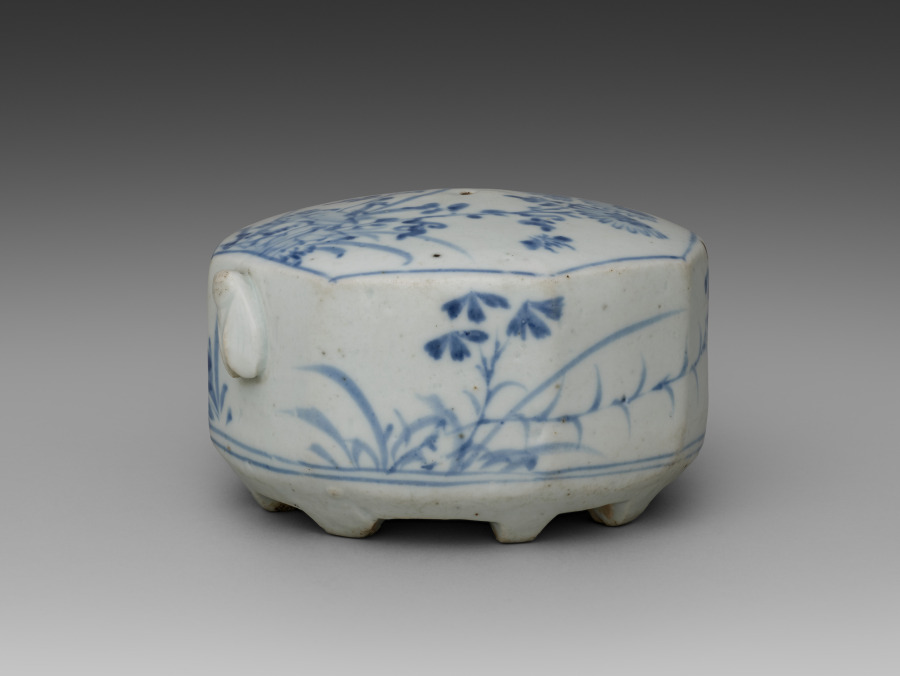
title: Octagonal Water Dropper Decorated with Flower Design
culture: Korea, Joseon dynasty (1392–1910)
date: late 1700s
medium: Porcelain with blue and white decoration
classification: Ceramic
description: A water dropper was an essential utensil for a literati man of the Joseon dynasty (1392–1910) in writing calligraphy. It was used to add water, by small drops, to an inkstone while grinding an ink stick. This work has a small spout in the shape of a cicada. This decorative element not only adds a sense of whimsical sensibility to this scholarly utensil, but also aims to symbolize the aspiration for scholarly achievement—as loud as the cicada’s song.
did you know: A small spout in the shape of a cicada is placed on one of the octagonal sides. This decorative element not only adds a sense of whimsical aesthetic sensibility to this scholarly utensil, but also aims to symbolize the aspiration for scholarly achievement—as loud as the cicada’s song.